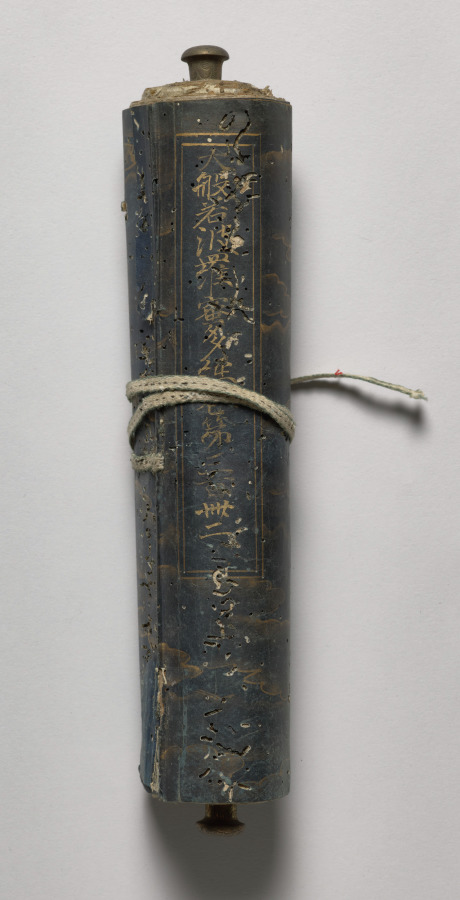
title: Volume from the Great Perfection of Wisdom Sutra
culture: Japan, Heian period (794–1185)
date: late 1100s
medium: Handscroll; ink and gold on dyed paper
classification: Manuscript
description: This scroll is part of the 600-volume Great Perfection of Wisdom Sutra. The sacred text addresses the perfection of wisdom and the nonsubstantiality of all phenomena, or the emptiness of all things. It takes the form of Shakyamuni Buddha’s preaching at four locations. This scroll is from the Perfection of Wisdom in 100,000 Lines, which occupies the first 400 volumes. At one time, religious clergy kept all the scrolls in a lacquered wood repository on view nearby. They are now too fragile to open and we will conserve them over time.